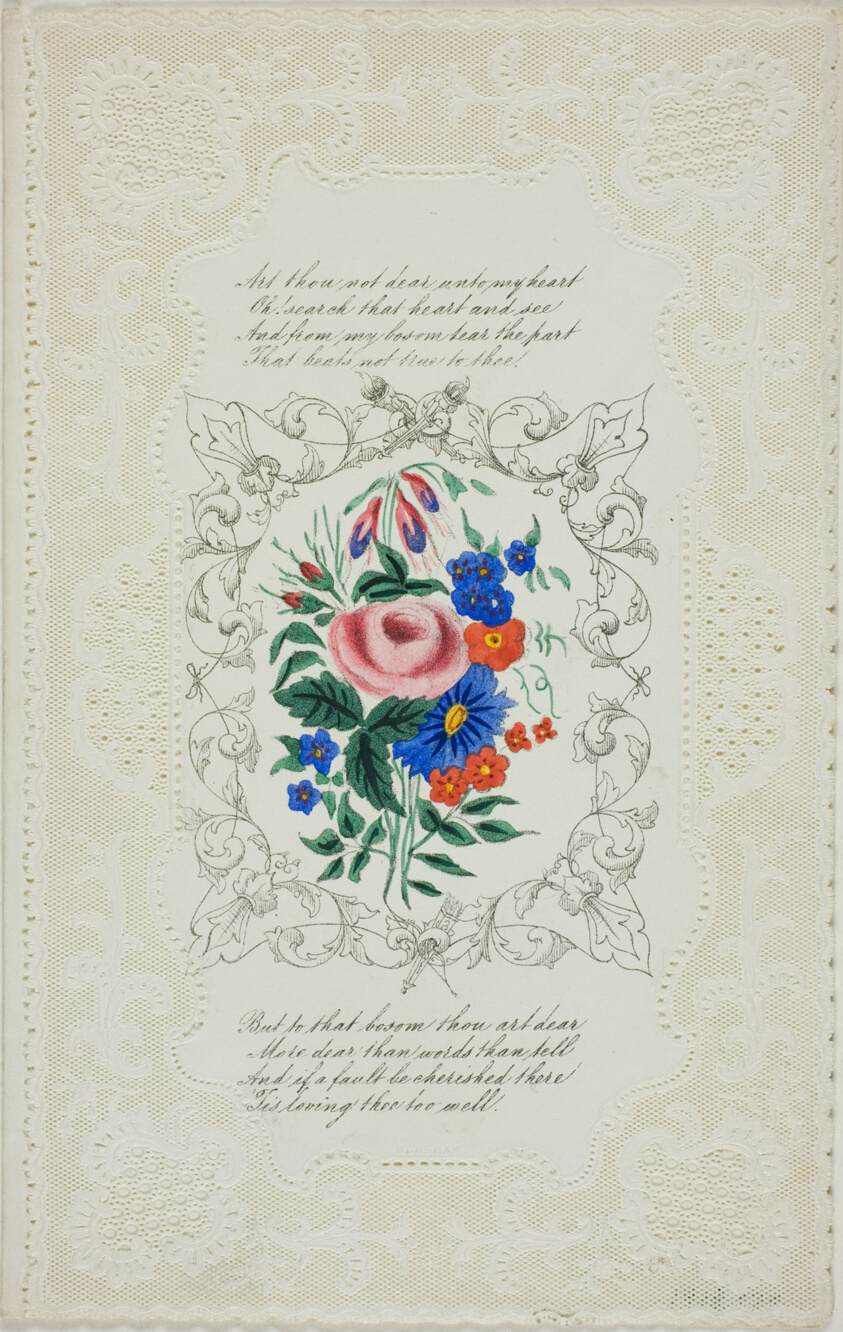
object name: Print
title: Art Thou Not Dear Unto My Heart (valentine)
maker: Unknown Artist; English, 19th century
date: c. 1850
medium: Lithograph with hand-coloring on cut and embossed ivory wove paper (lace)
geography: England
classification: valentine; prints and drawing; print